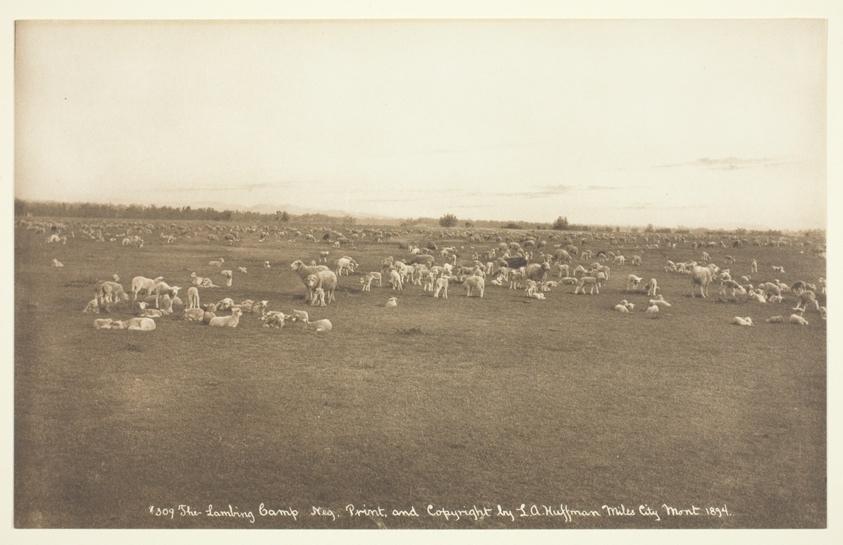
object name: Photograph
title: The Lambing Camp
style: 19th century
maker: Laton Alton Huffman (American, 1854–1931)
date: 1894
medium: Gelatin silver print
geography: United States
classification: gelatin silver (developing-out-paper) pr; photographic process; photography; photograph